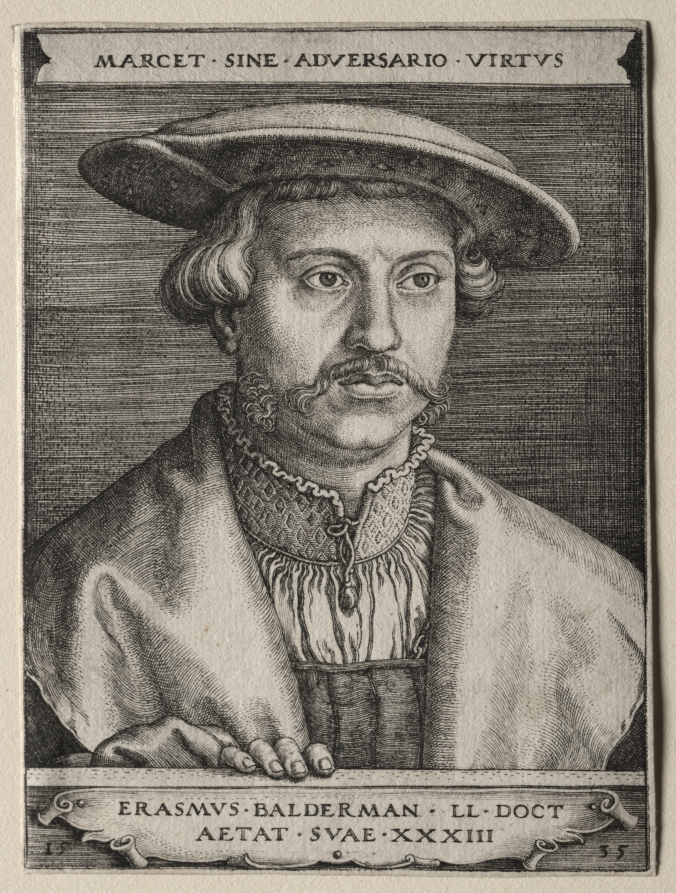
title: Erasmus Balderman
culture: Germany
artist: Barthel Beham (German, 1502–1540)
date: 1535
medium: engraving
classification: Print